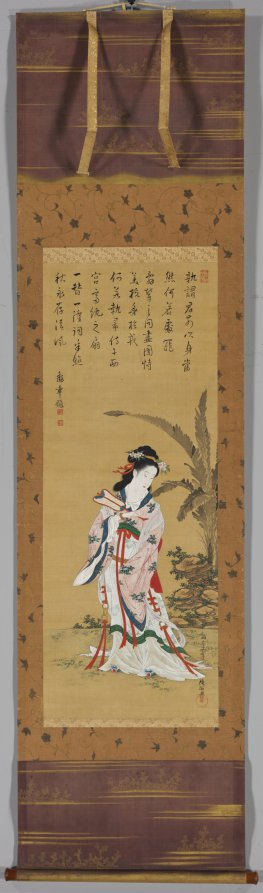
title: Chinese Beauty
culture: Japan, Edo period (1615–1868)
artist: Kubo Shunman (Japanese, 1757–1820)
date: late 1700s–early 1800s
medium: Hanging scroll; ink and color on silk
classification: Painting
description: Ukiyo-e artists’ exploration of beautiful people extended to figures from other lands. Here, an elegant Chinese palace lady holding a fan stands before a banana plant. The poem at the top is written in a Japanese appropriation of Chinese called kanbun. Based on its imagery of a palanquin (an enclosed couch with poles used for carrying passengers), silk fan, and autumn winds, it may allude to the story of Lady Ban (about 48 BC–about AD 2). A Chinese beauty famous for her scholarly achievements, Ban was once consort to an emperor but later lost his favor. In a poem attributed to her, she compared herself to a used silk fan put away in autumn.